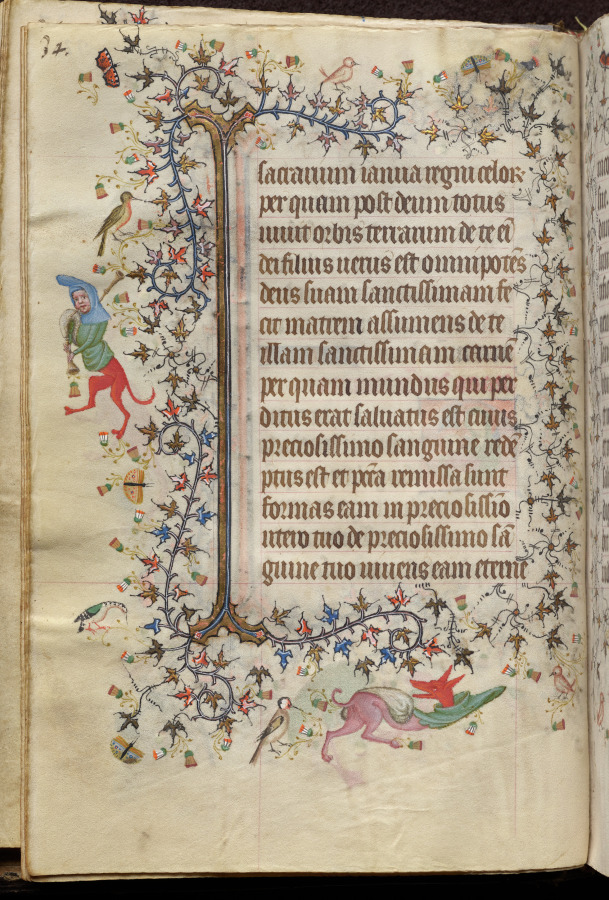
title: Hours of Charles the Noble, King of Navarre (1361-1425): fol. 17v, Text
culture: France, Paris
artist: Master of the Brussels Initials and Associates (French)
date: c. 1405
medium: ink, tempera, and gold on vellum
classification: Bound Volume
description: This precious volume was obviously highly prized by its owner, the French-born King of Navarre, who had his coat of arms painted on no less than twenty folios. Rather than directly commissioning this manuscript from a specific workshop, it seems that Charles the Noble acquired his book of hours -- perhaps ready-made for the luxury market -- while on a trip to Paris in 1404-05. A collaborative effort, six painting styles are evidenced within the pages of this codex, those of two Italians, two Frenchmen, and two Netherlanders. The painter who was responsible for the planning and decoration of the book, and who produced seventeen of the large miniatures, was a Bolognese artist known as the Master of the Brussels Initials. His principal assistant, responsible for most of the borders, was a Florentine who signed his name "Zecho" da Firenze on folio 208 verso.